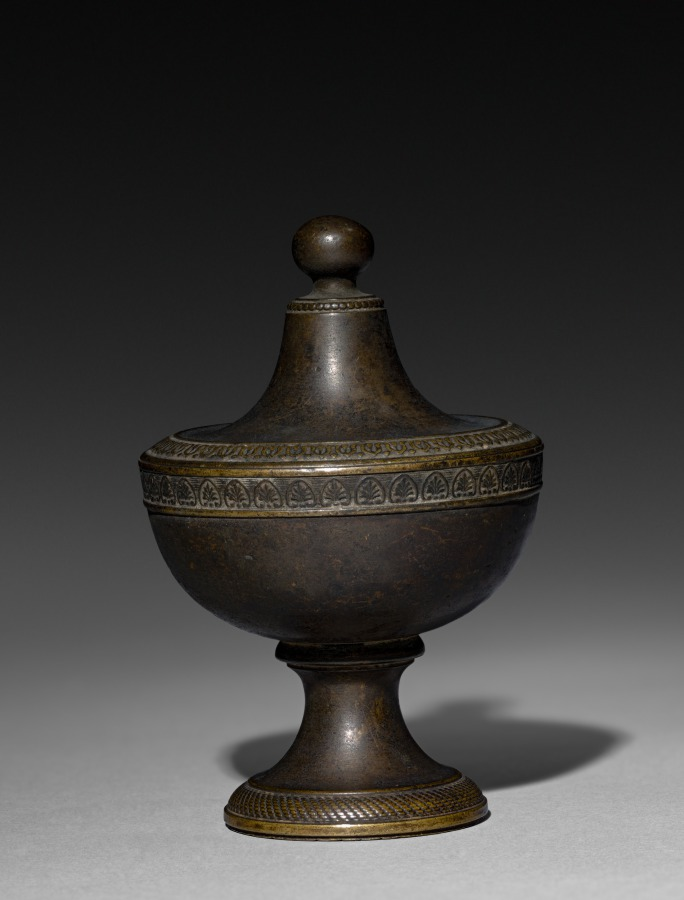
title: Ornamental Finial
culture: France, early 19th century, Empire Style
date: early 1800s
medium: bronze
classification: Metalwork